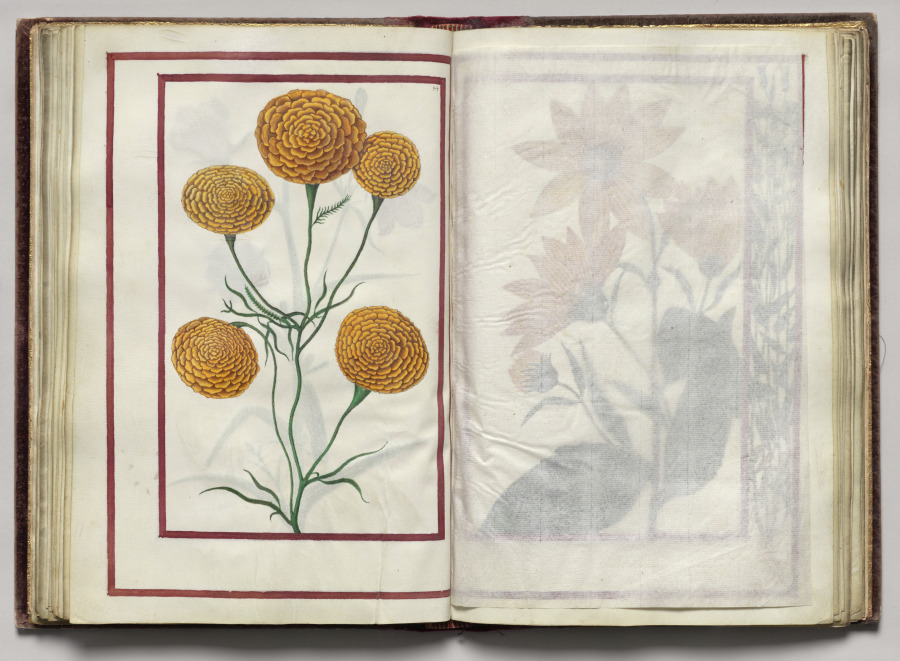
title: Campanula, folio 27 (verso), from Florilegium (A Book of Flower Studies)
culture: France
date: 1608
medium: watercolor, ink, silver, and gold over occasional traces of pencil, on vellum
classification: Bound Volume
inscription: Dated: Poitiers 1608 (on frontispiece) Signed: On frontispiece in black ink, lower right: Van Kuyk Notation on drawing: Frontispiece: in pencil, lower margin: * élève de Van Kessel, peintre flammand (* in pencil also appears in front of Van Kuyk's name).